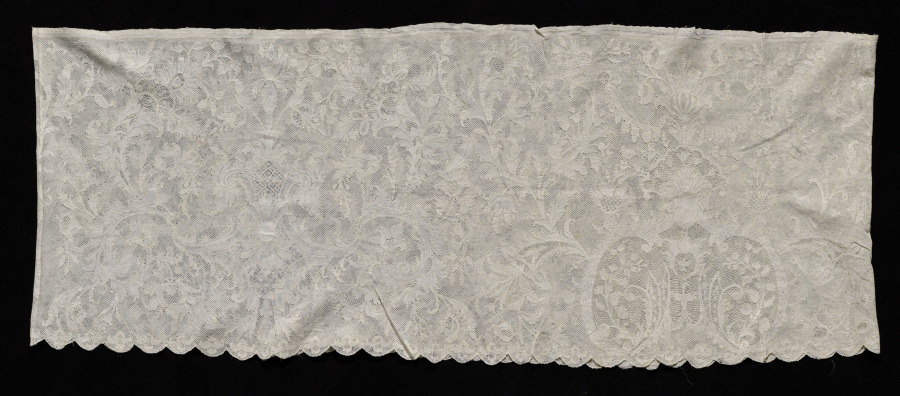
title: Lace Flounce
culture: Belgium (Flanders)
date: 1700–1720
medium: Linen: bobbin lace (mesh ground)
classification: Lace